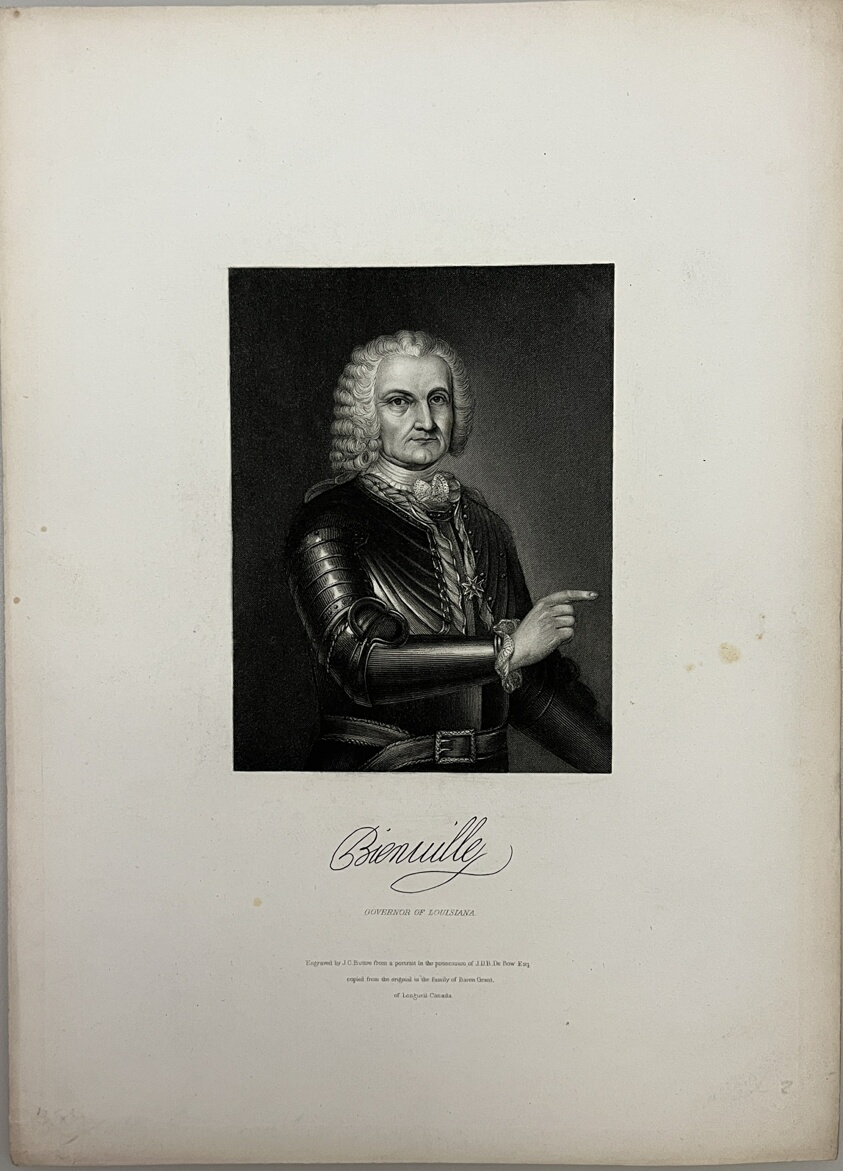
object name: Print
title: Bienville, Governor of Louisiana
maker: John Chester Buttre (American, 1821-1893); after Artist Unknown (American, 19th century)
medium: Etching on paper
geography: United States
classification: reproduction; print; prints and drawing